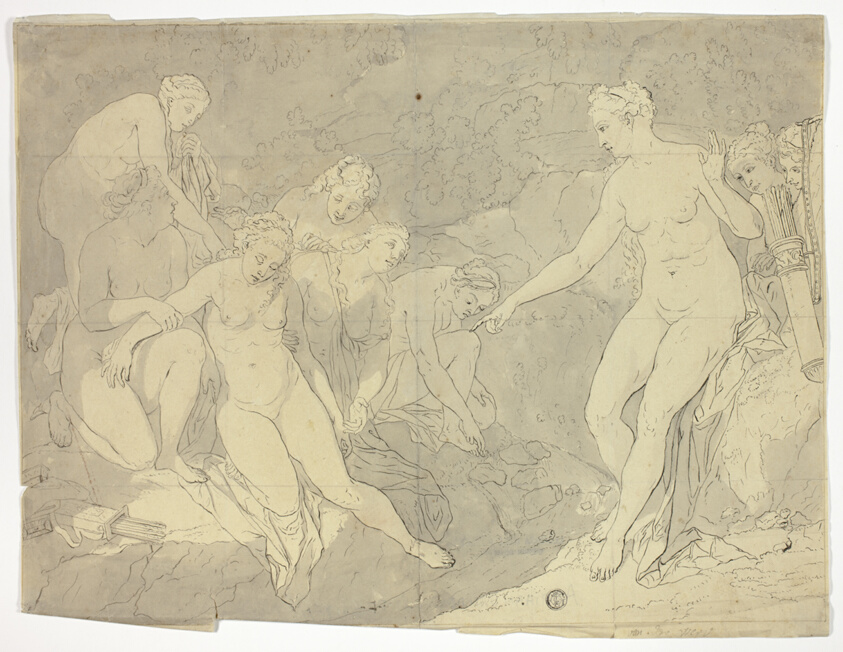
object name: Drawing and Watercolor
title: Diana and Callisto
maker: Possibly Adriaen van der Werff; Dutch, 1659-1722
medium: Pen and black ink, with brush and gray wash, on cream laid paper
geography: Holland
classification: ink or chalk wash; drawings (visual works); prints and drawing